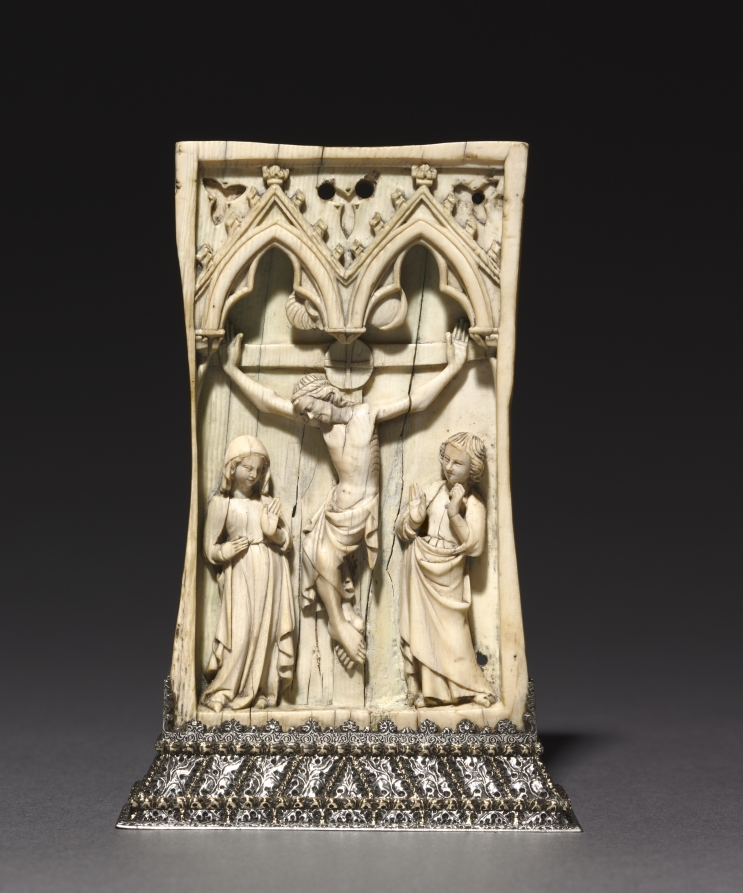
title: Plaque: The Crucifixion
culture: France or England, Gothic period, 14th century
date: c. 1345–1365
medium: ivory, mounted in a silver stand (after 1919)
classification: Ivory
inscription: engraved on bottom of later silver base: M. Buccellati, Milano, Roma, Firenza.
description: This plaque, once the right wing of a diptych (two-paneled carving), was slightly altered during its history by carving an arc into the sides, perhaps to force it into a frame. The silver base, added after 1919, is signed: "M. Bucellati, Milano, Roma, Firenze."